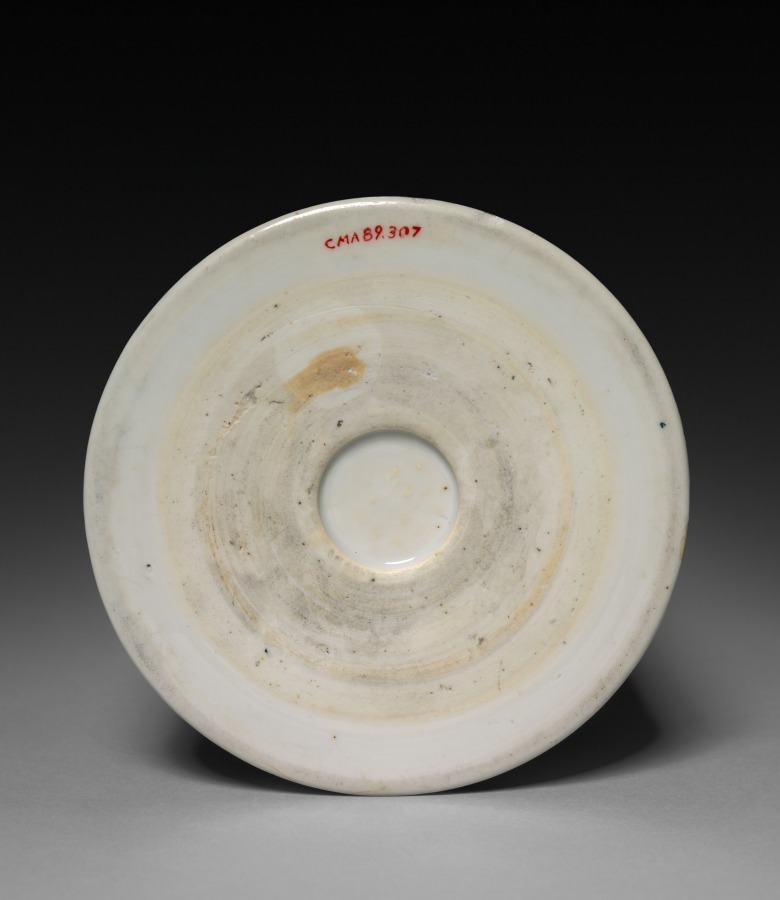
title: Brush Pot with Landscape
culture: China, Jiangxi province, Jingdezhen kilns, Qing dynasty (1644-1911), Kangxi reign (1662-1722)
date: 1662–1722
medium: porcelain with underglaze blue decoration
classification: Ceramic